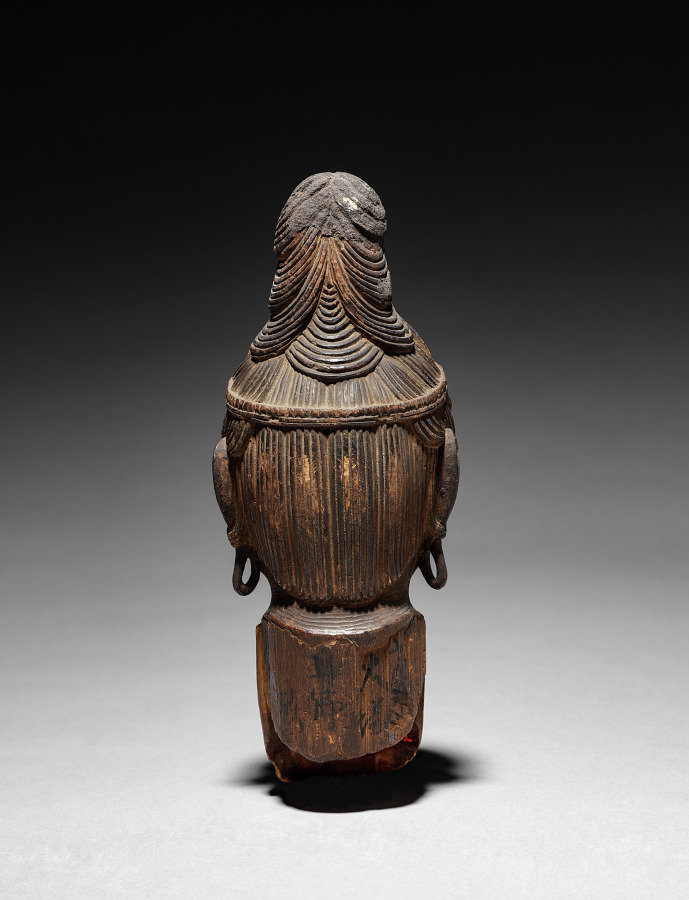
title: Head of Kannon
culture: Japan, Edo period (1615–1868)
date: late 1600s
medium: wood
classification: Sculpture